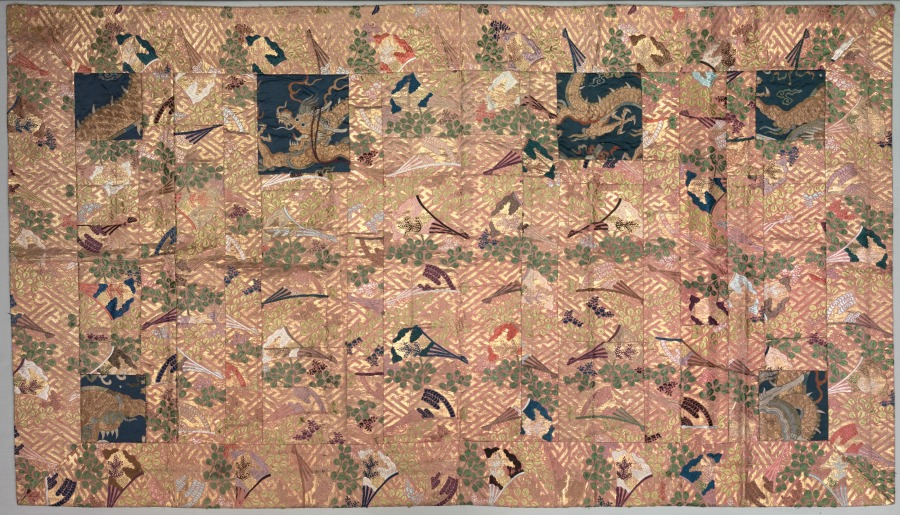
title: Buddhist Priest Robe and Sash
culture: Japan, Edo period (1615-1868) or Meiji period (1868-1912), 19th century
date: 1800s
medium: silk, brocaded; metal thread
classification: Garment